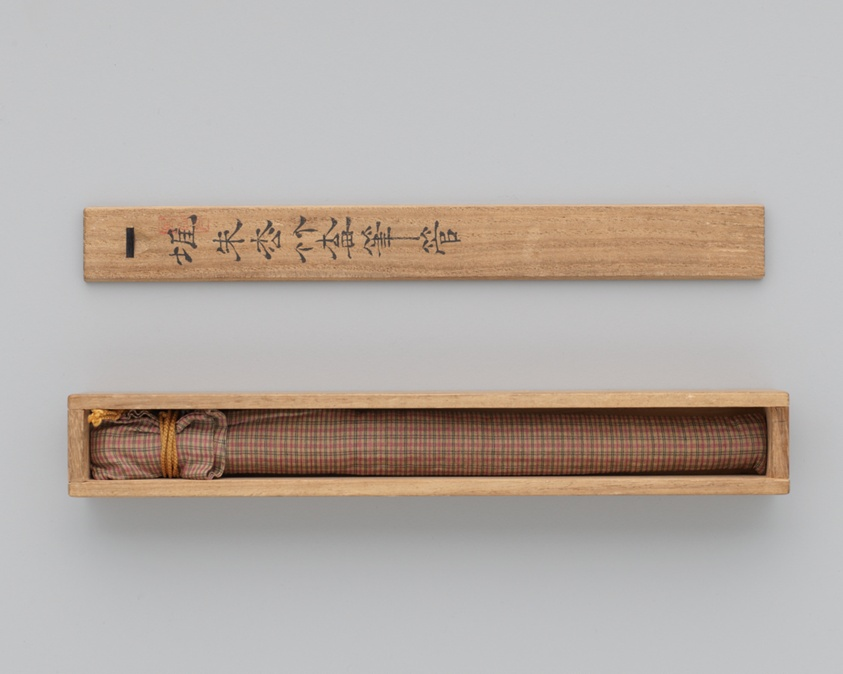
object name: Decorative Arts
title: Writing Brush and Cover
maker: China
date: Late Ming（1368-1644）or early Qing（1644-1912）dynasty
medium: Cinnabar Lacquer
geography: China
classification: lacquer